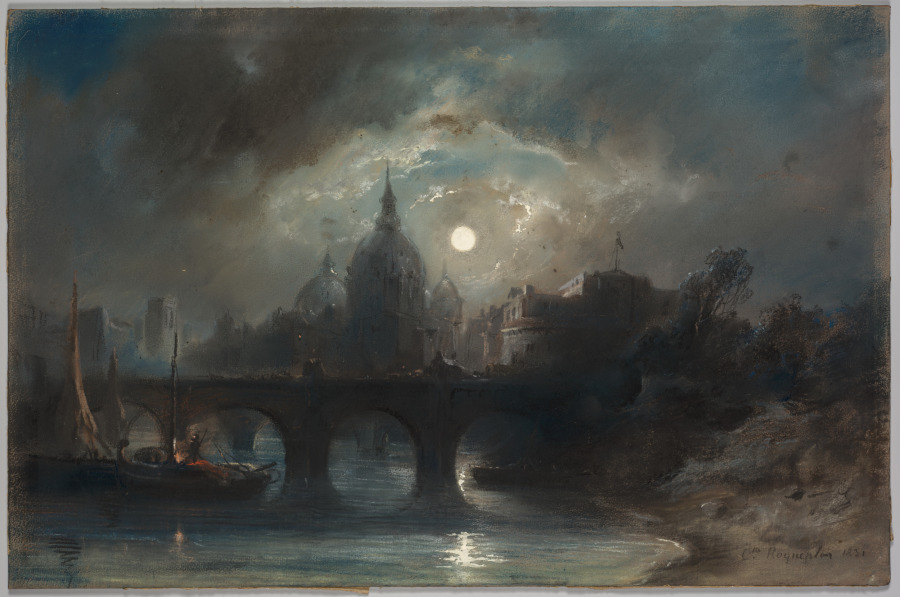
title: View of a City at Night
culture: France, 20th century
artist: Camille Roqueplan (French, 1803–1855)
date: 1831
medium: pastel heightened with white gouache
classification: Drawing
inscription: Inscribed lower right: Clle Roqueplan 1831